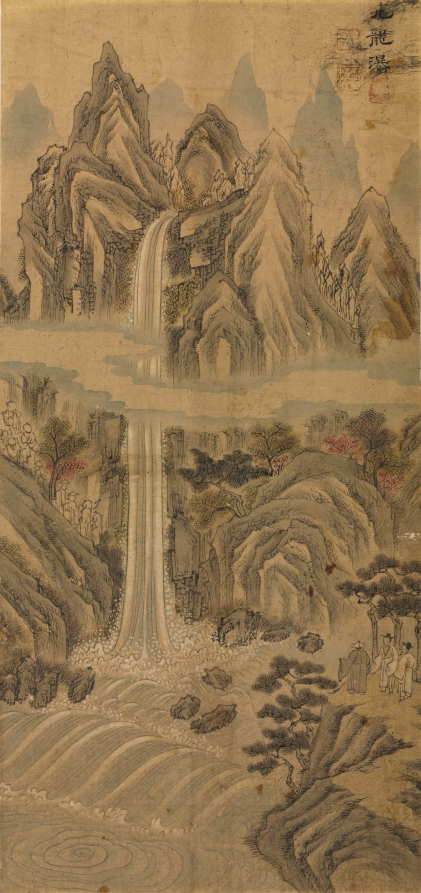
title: Nine-Dragon Falls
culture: Korea, Joseon dynasty (1392–1910)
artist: Han Unpyeong (Korean)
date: late 1800s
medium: ink and color on paper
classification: Painting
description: The Nine-Dragon Falls 구룡포 is one of the popular tourist sites at the Diamond Mountain 금강산 in North Korea. Its V-shaped valley that opens into a rushing white waterfall is its major attraction, allowing visitors to experience the powerful forces of nature. In this painting, two excited scholar tourists accompanied by a Buddhist monk are enjoying both the spectacle and the roar generated by the cascading waterfall.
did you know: The Nine-Dragon Falls, the main subject of this painting, is about 240 feet (74 meters) high.